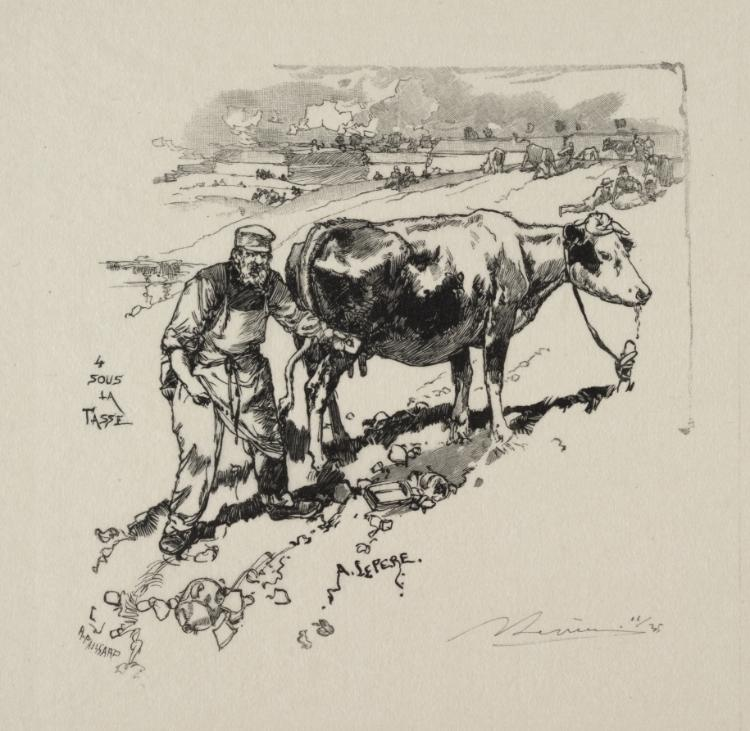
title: Le marchand de lait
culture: France, 19th-20th century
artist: Auguste Louis Lepère (French, 1849–1918)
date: c. 1870–1918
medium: wood engraving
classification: Print